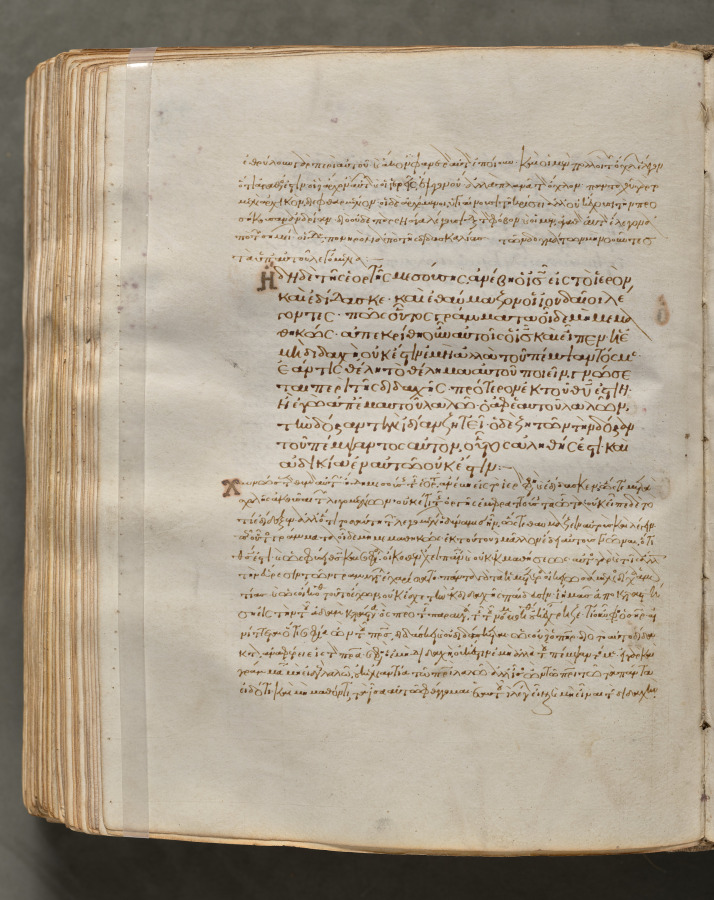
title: Text, folio 357 (verso), from a Gospel Book with Commentaries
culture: Byzantium, Constantinople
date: c. 1000–1100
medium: ink, tempera, and gold on vellum; leather binding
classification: Bound Volume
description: Each of the four gospels in this book opens on a page with brilliantly illuminated borders depicting the author of the text as well as birds—principally peacocks, symbols of the immortality of the soul—and fountains, representing the fountain of life and the salvation of the soul. This volume consists of 428 leaves with texts in Greek. Its level of sophistication suggests that it was probably written and decorated in a monastery in Constantinople.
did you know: Gospel books were carried in procession through Byzantine churches.